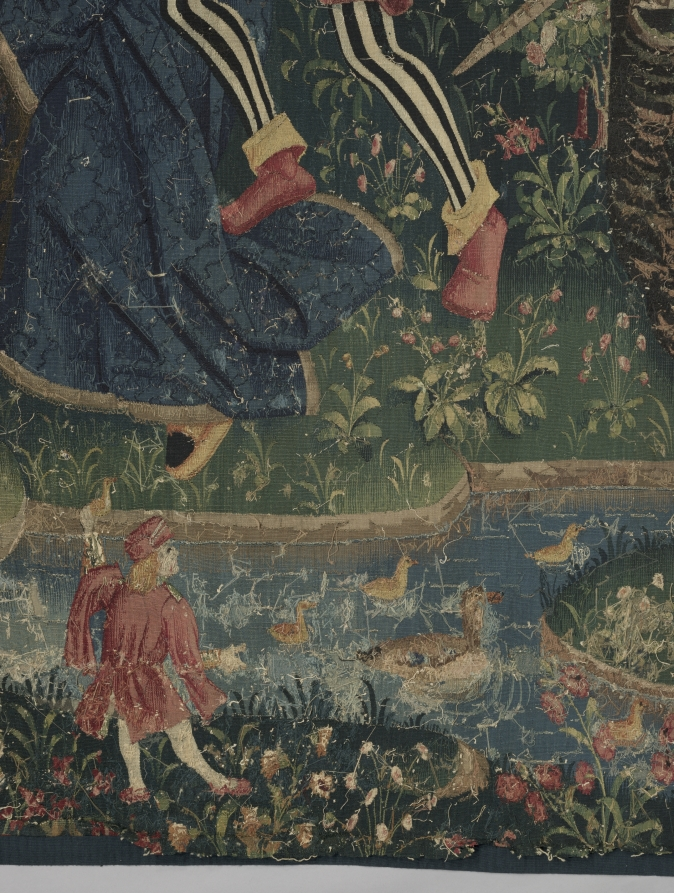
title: Time (from Chateau de Chaumont set)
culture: France, Lyon(?), early 16th century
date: 1512–15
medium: silk and wool; tapestry weave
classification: Tapestry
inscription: French verse in Gothic letters translates as follows: "One sees the weather adorned in green, Sometimes as pleasing as an angel; To suddenly change and be quite strange, The weather never stays the same."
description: Pierre Sala, who likely commissioned the set, is portrayed as the richly attired central figure offering a bouquet, a symbol of knowledge, to Éléonore, his daughter. Éléonore is pregnant, revealed by her upturned skirt and the persimmon in her husband Hector’s hand. Hector’s mother, Marguerite, in dark attire, will wed the widowed Sala in 1519. They appear in front of the royal chateau of Blois. The figures at the right convey Sala’s advice to his children. Time (the old man with the staff) with Clio, the Muse of History, standing on his shoulders, is being attacked by a Herculean youth wielding a stick. With this allegory, Sala is explaining that youth is ignorant of the complexities of life and time. The small unicorn at the far right represents the soul. The verse in Old French at the top refers to changing time: One sees Time adorned with green foliage, Sometimes as pleasant as an angel, Then suddenly change and become quite strange. Never does Time persist in one state.